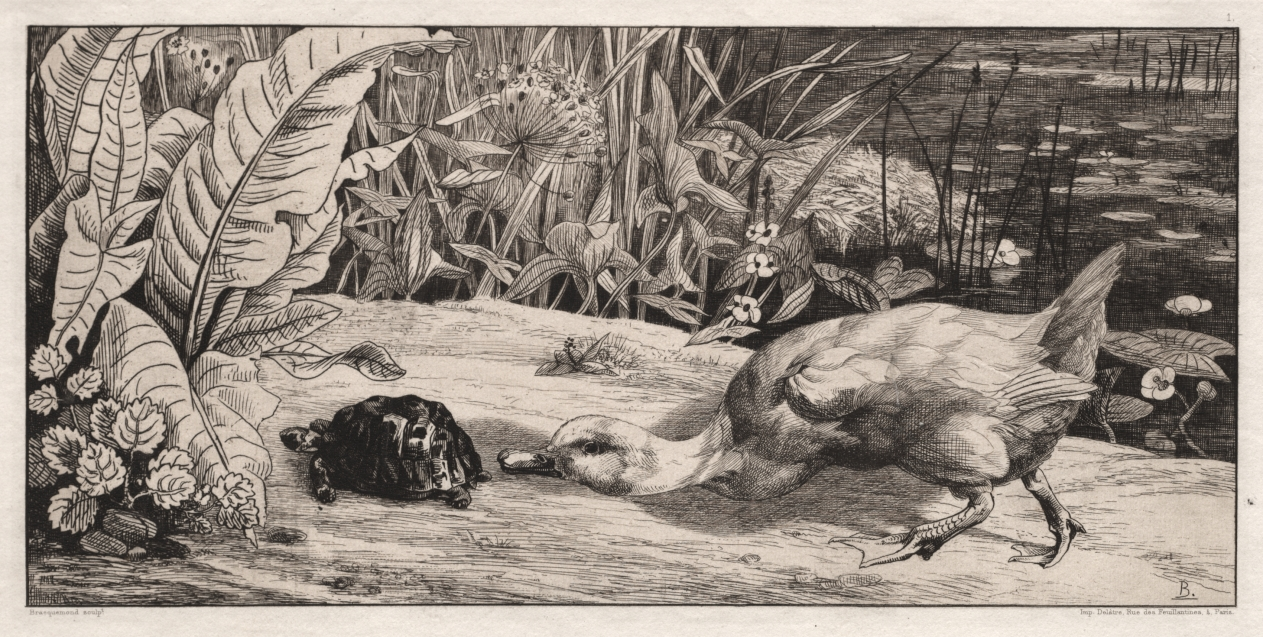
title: The Unknown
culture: France, 19th century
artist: Félix Bracquemond (French, 1833–1914)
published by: A. Cadart & F. Chevalier, rue Richelieu, 66, Paris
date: 1862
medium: etching and drypoint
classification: Print